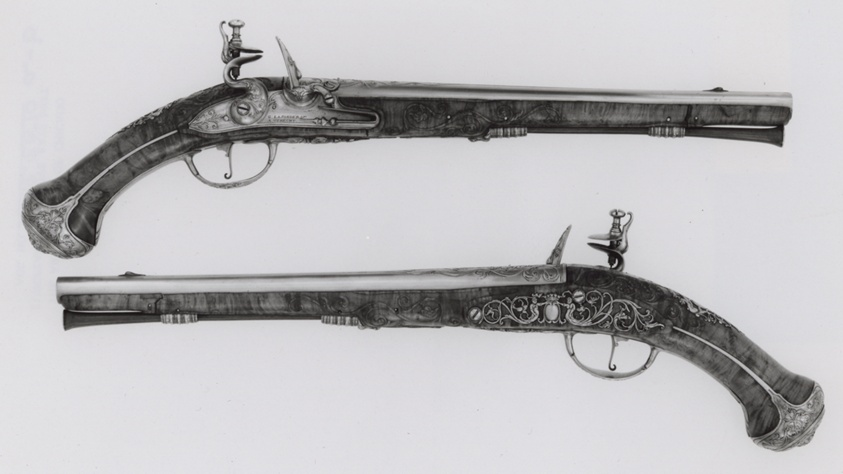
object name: Arms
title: Pair of Flintlock Holster Pistols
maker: Gunsmith: Gerrit Lasonder; (Dutch, active 1659-87); Utrecht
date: c. 1680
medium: Steel, copper, walnut burl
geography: Utrecht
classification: firearm-handgun; arms; arms and armor